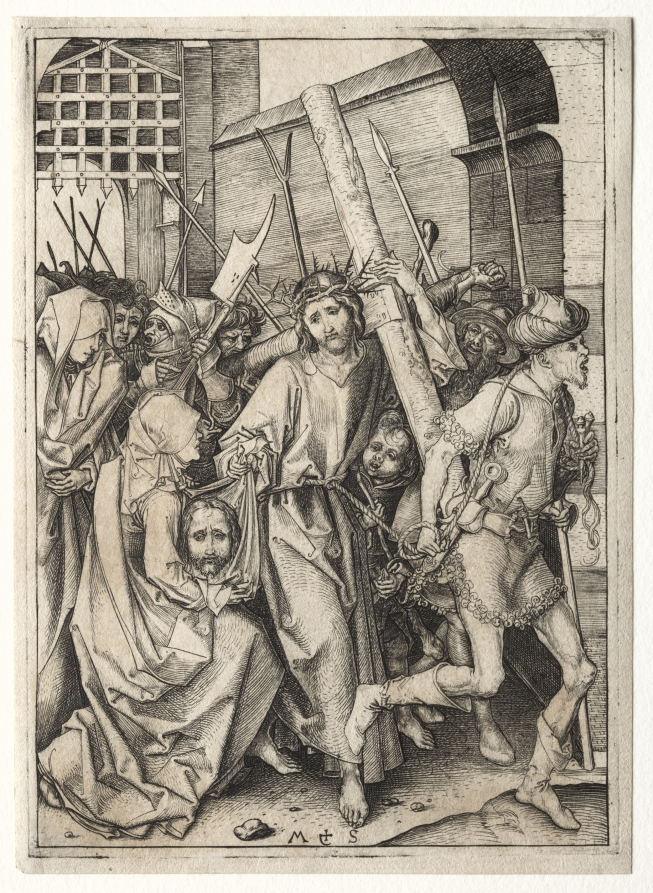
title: The Passion: Christ Bearing the Cross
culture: Germany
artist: Martin Schongauer (German, c. 1450–1491)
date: c. 1480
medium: engraving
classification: Print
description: Martin Schongauer's series of the Passion of Christ was his largest set of engravings, made around 1480, and extensively copied across Europe. It consists of twelve prints detailing the suffering of Christ in the last days of his life. Schongauer's version focuses on crowded scenes, grotesque physiognomies of Christ's tormentors, and great pathos in the compositions. Here, a long procession exits the city gate of Jerusalem. Christ, at the center, is weighed down by the heavy cross which he must carry to Calvary. On the left, the Virgin Mary cries for the imminent death of her son, while Veronica holds the sudarium, used to wipe his sweat and blood, and imprinted with his face.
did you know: Veronica's veil, or the sudarium, retained an imprint of Christ's face and was believed in the late Middle Ages to have the power to self-replicate each time it came into contact with other clothes.